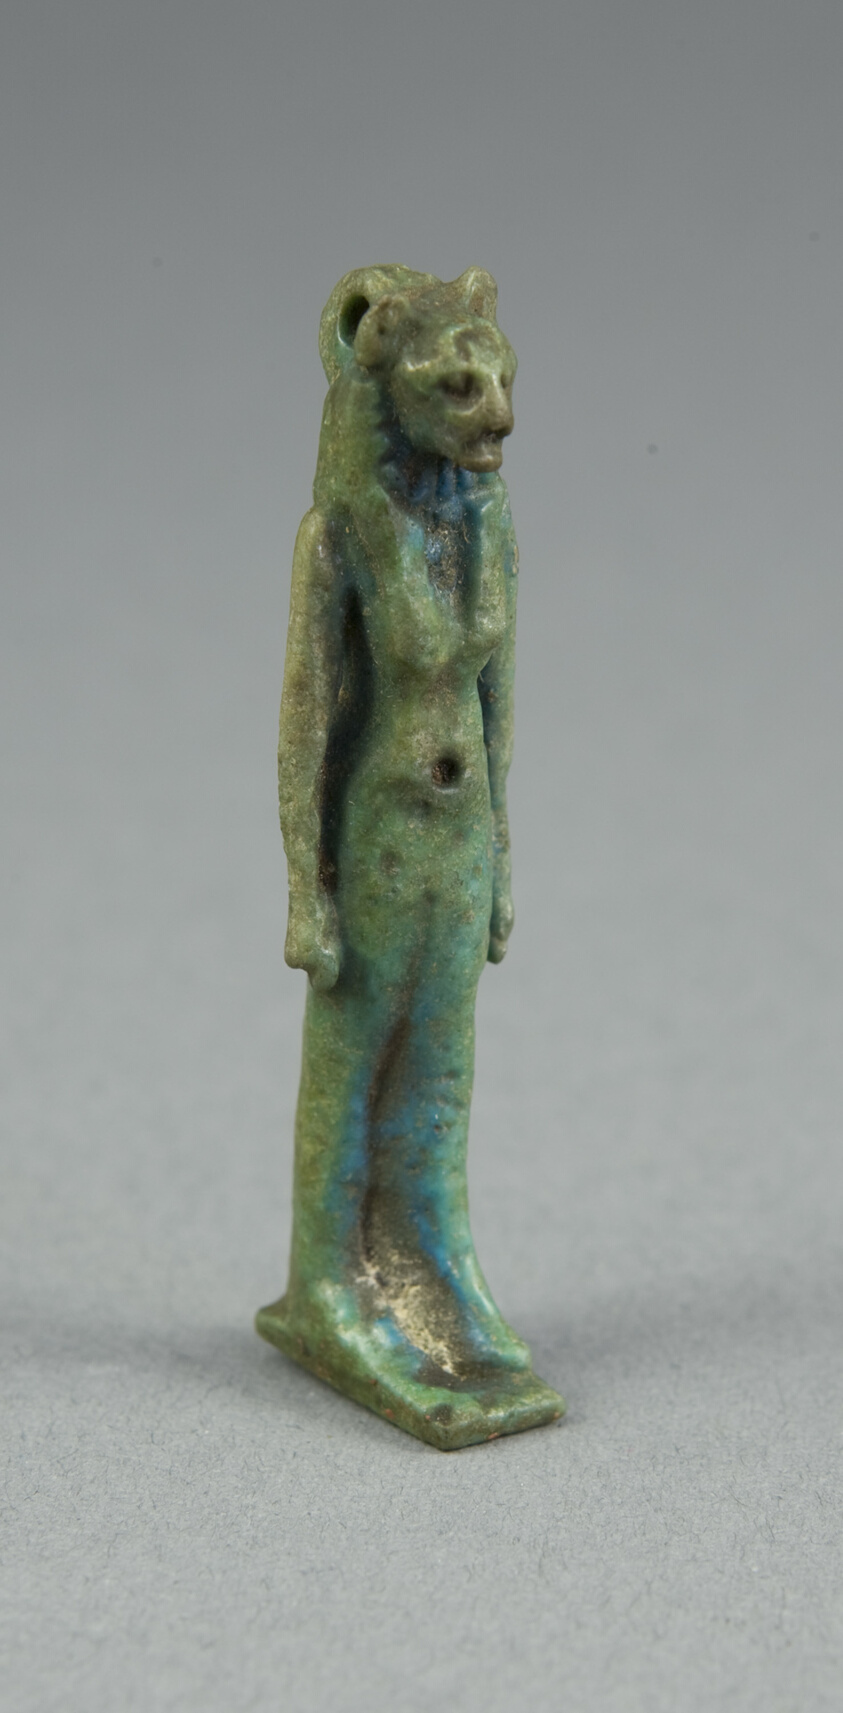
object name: Costume and Accessories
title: Amulet of the Goddess Sekhmet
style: egyptian, ancient, new kingdom, third intermediate period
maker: Egyptian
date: New Kingdom–Third Intermediate Period (about 1550–664 BCE)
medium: Faience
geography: Egypt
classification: amulet; jewelry; ancient art; costume; faïence (composite material)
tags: goddesses, deities, feline, lions